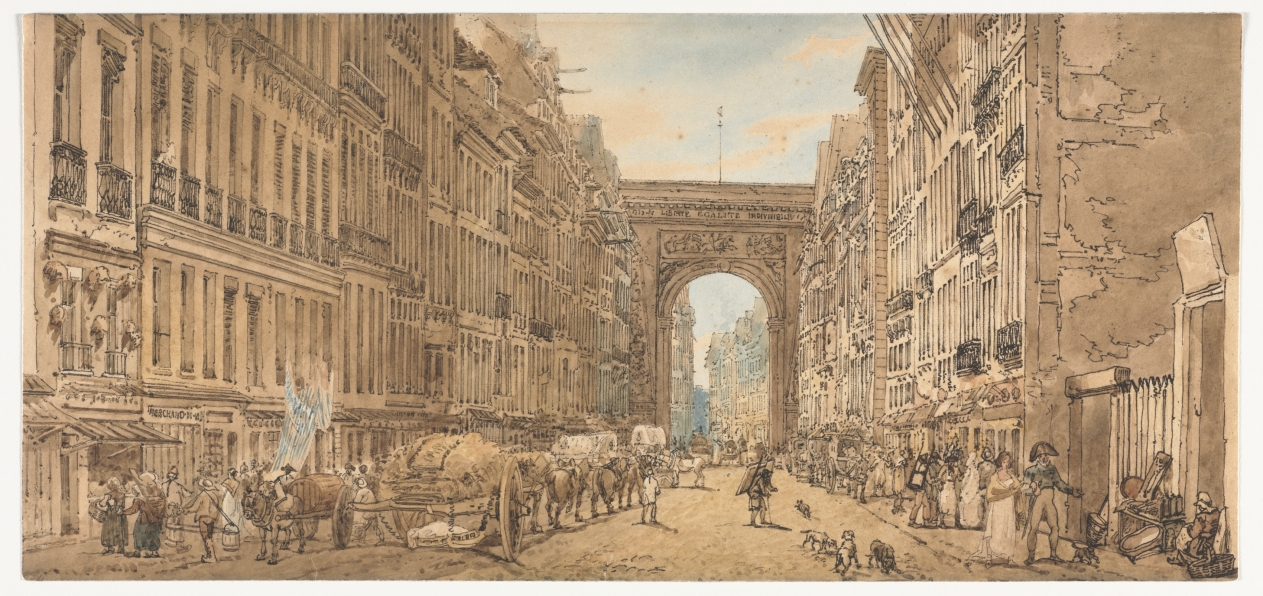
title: A Selection of Twenty of the Most Picturesque Views in Paris: View of the Gate of St. Denis taken from the Suburbs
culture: England, early 19th Century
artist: Thomas Girtin (British, 1775–1802)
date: 1802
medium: soft-ground etching with bistre wash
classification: Print